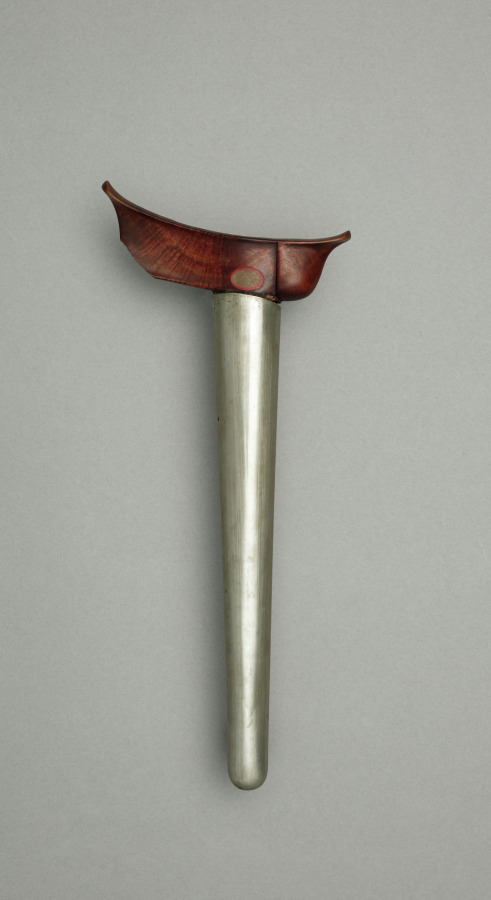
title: Scabbard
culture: Philippines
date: before 1916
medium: wood and silver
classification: Arms and Armor